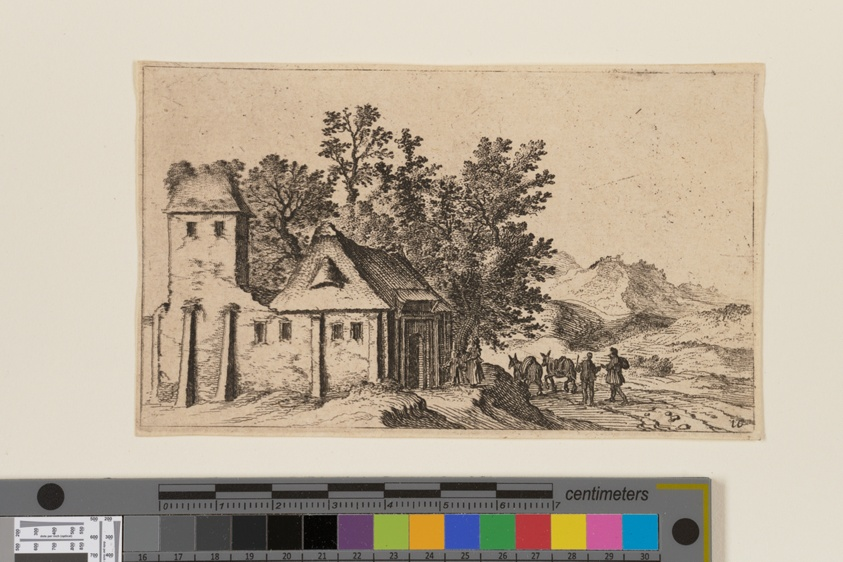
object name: Print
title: Farm before Trees in Hilly Country, from Twelve Landscapes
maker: Gillis van Scheyndel (Dutch, 1595–1660)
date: c. 1605-1650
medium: Etching on ivory laid paper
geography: Netherlands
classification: etching; paper; print; prints and drawing